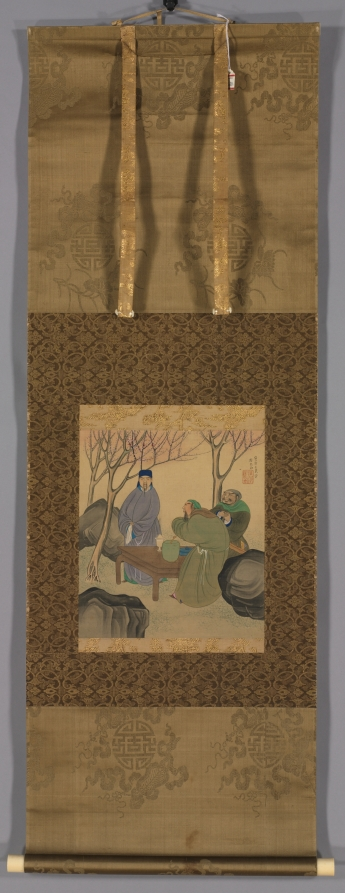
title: Oath of the Peach Garden, from Romance of the Three Kingdoms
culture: Japan, Edo period (1615–1868)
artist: Matsumura Goshun (Japanese, 1752–1811)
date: c. 1780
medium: hanging scroll; ink and color on silk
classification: Painting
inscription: Artist's signature and seal at upper right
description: This painting depicts a pivotal scene from the classic Chinese historical novel Romance of the Three Kingdoms. Three men, Liu Bei, seen to the left, and Guan Yu and Zhang Fei, seen to the right, become sworn brothers amid peach blossom trees. Set toward the end of China’s Eastern Han dynasty (25–220 CE), the episode features the tagline “We seek not to be born on the same day but hope that we may die on the same day.” Written in the 1300s, the first published translation in Japanese appeared around 1690, after which it exploded in popularity.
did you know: Matsumura Goshun was trained in literati art by Yosa Buson and Maruyama Ōkyo.